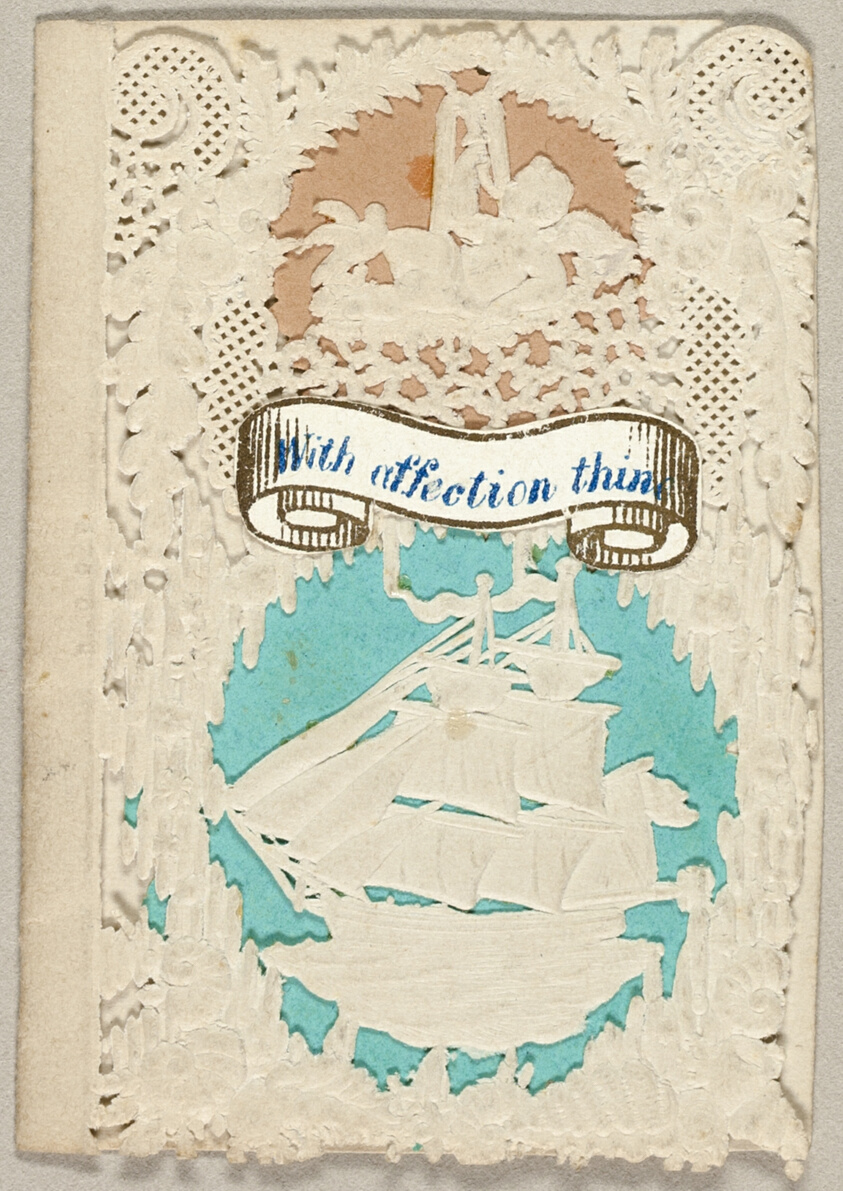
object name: Drawing and Watercolor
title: With Affection Thine (valentine)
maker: Thomas Wood (English, 19th century)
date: c. 1850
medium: Collaged elements on cut and embossed (designed) ivory wove paper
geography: England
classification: collage; valentine; prints and drawing; paper